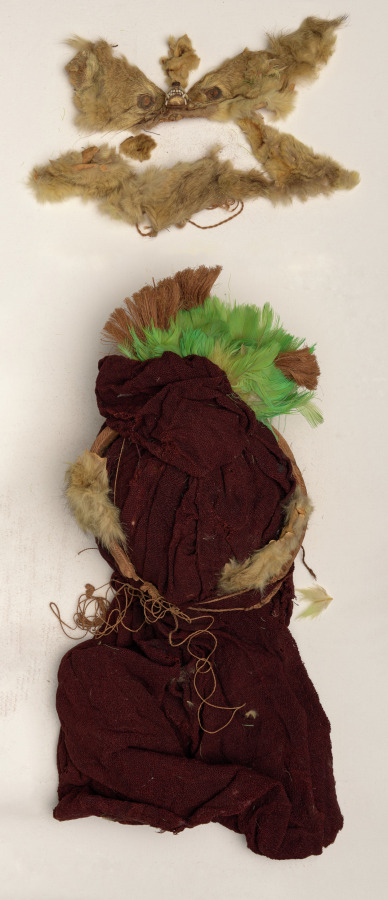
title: Mummy Bundle Turban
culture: Peru, South Coast, Paracas, 200 BC - AD 200, modern assembly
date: c. 650–100 BCE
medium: cotton, reed, wool, fur, feathers and other fibers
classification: Textile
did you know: While all the components appear to be original, they were assembled in modern times.